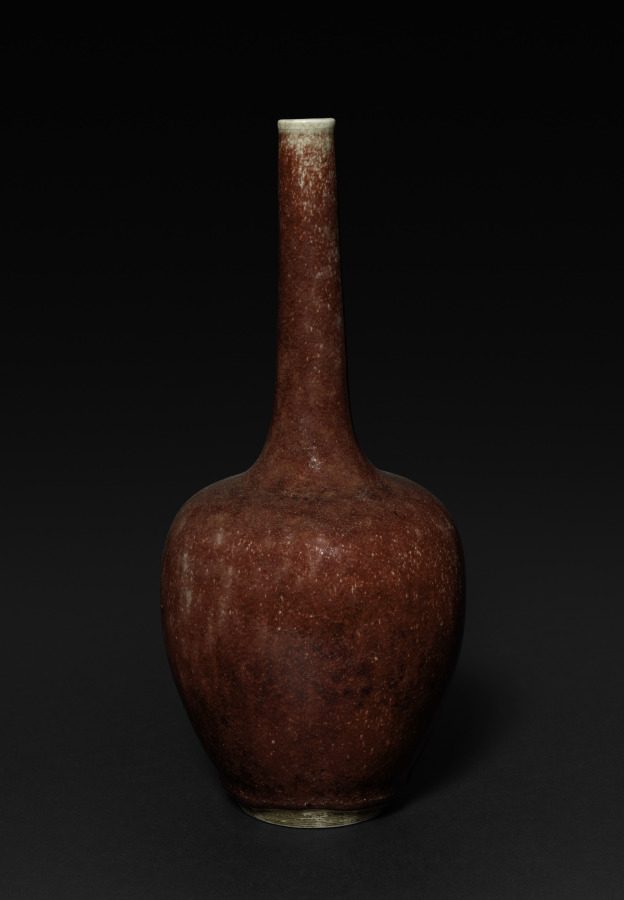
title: Bottle Vase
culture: China, Jingdezhen, Jiangxi province, Qing dynasty (1644–1911), Kangxi reign (1662–1722)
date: 1662–1722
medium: porcelain, Lang ware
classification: Ceramic